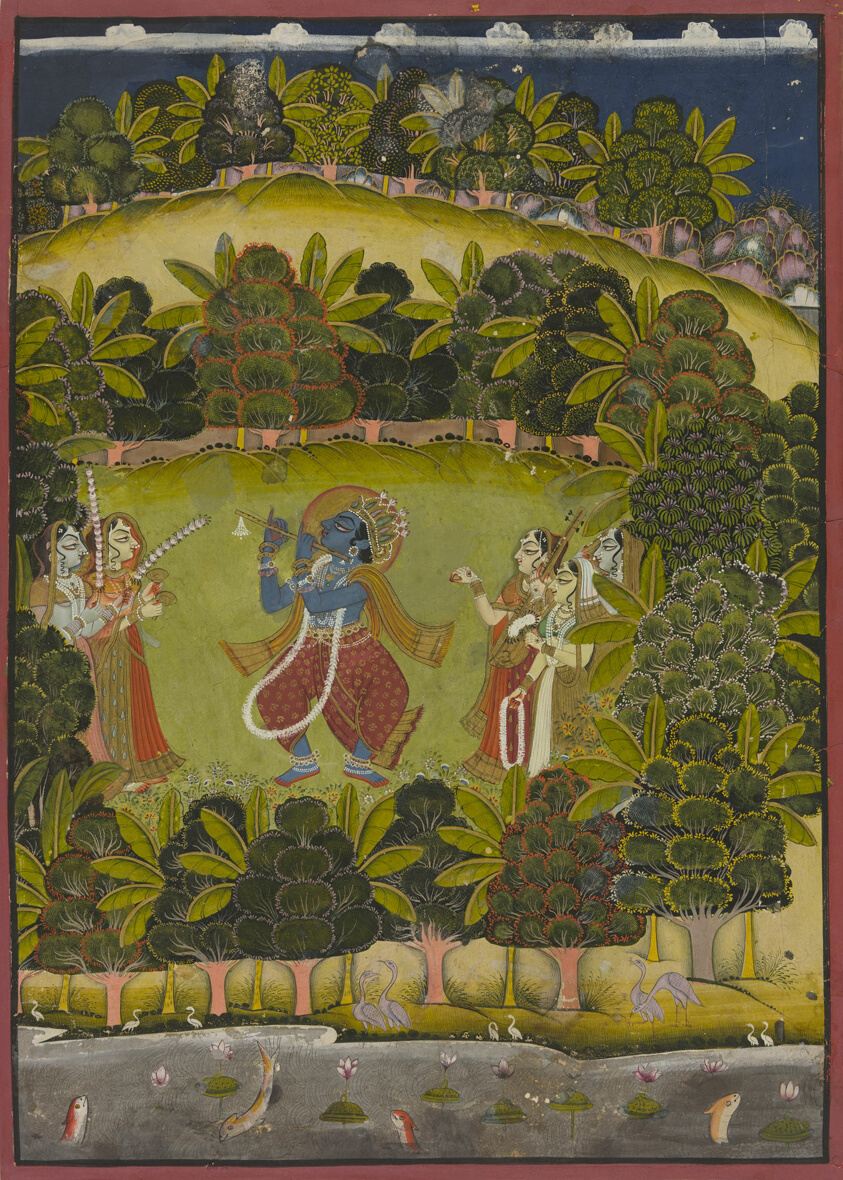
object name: Painting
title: Krishna Fluting for the Gopis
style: rajasthani, rajput, Indian (South Asian), South Asian, asian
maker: India; Rajasthan, Jodhpur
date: Late 18th or early 19th century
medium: Opaque watercolor, gold and tin alloy on paper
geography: Jodhpur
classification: painting; asian art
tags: music, musicians